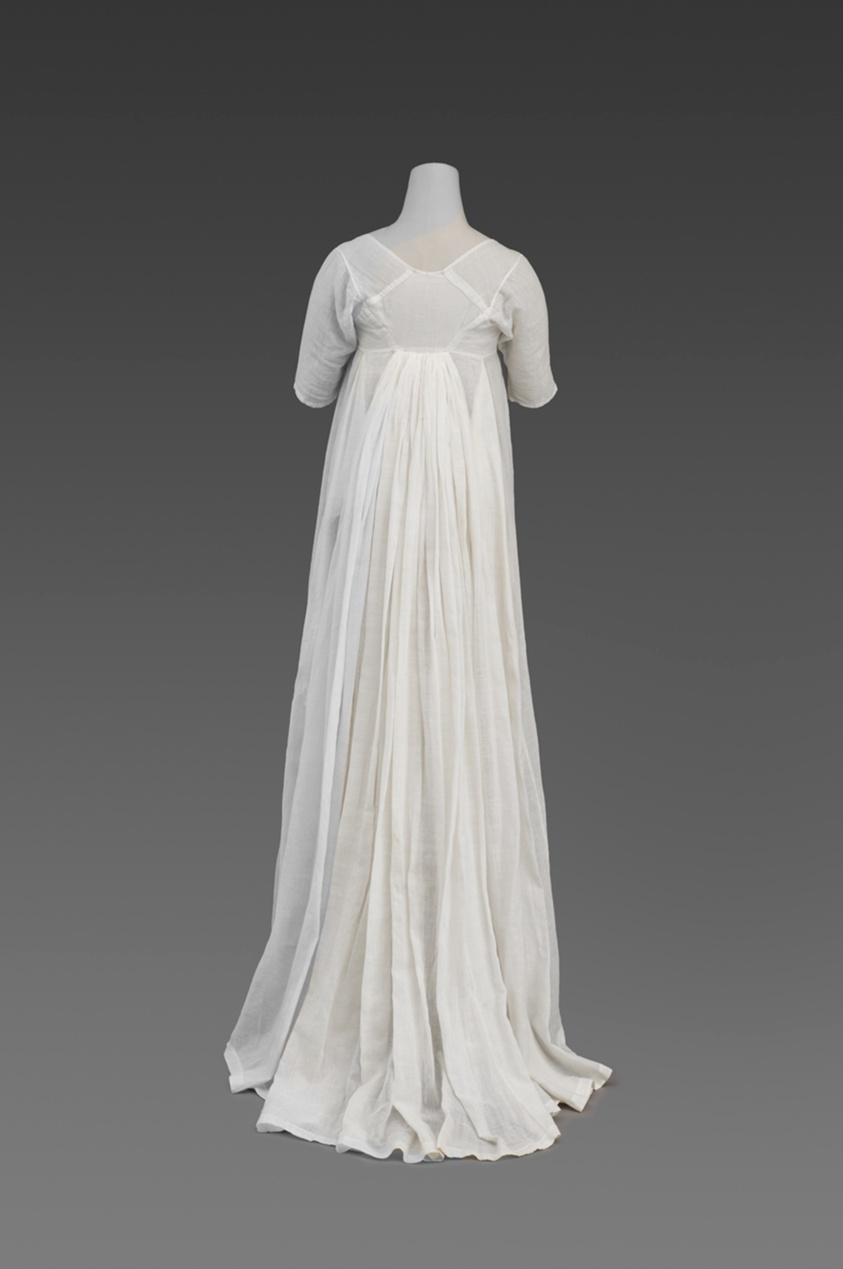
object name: Costume and Accessories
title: Woman's Day Dress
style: Neoclassicism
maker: Made in France with cotton imported from India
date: c. 1800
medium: Cotton, hand-spun, hand-woven plain weave called mulmul or muslin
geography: India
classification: costume; dress (garment); clothing; garment; textile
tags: dresses, fashion, garment, clothing, costume